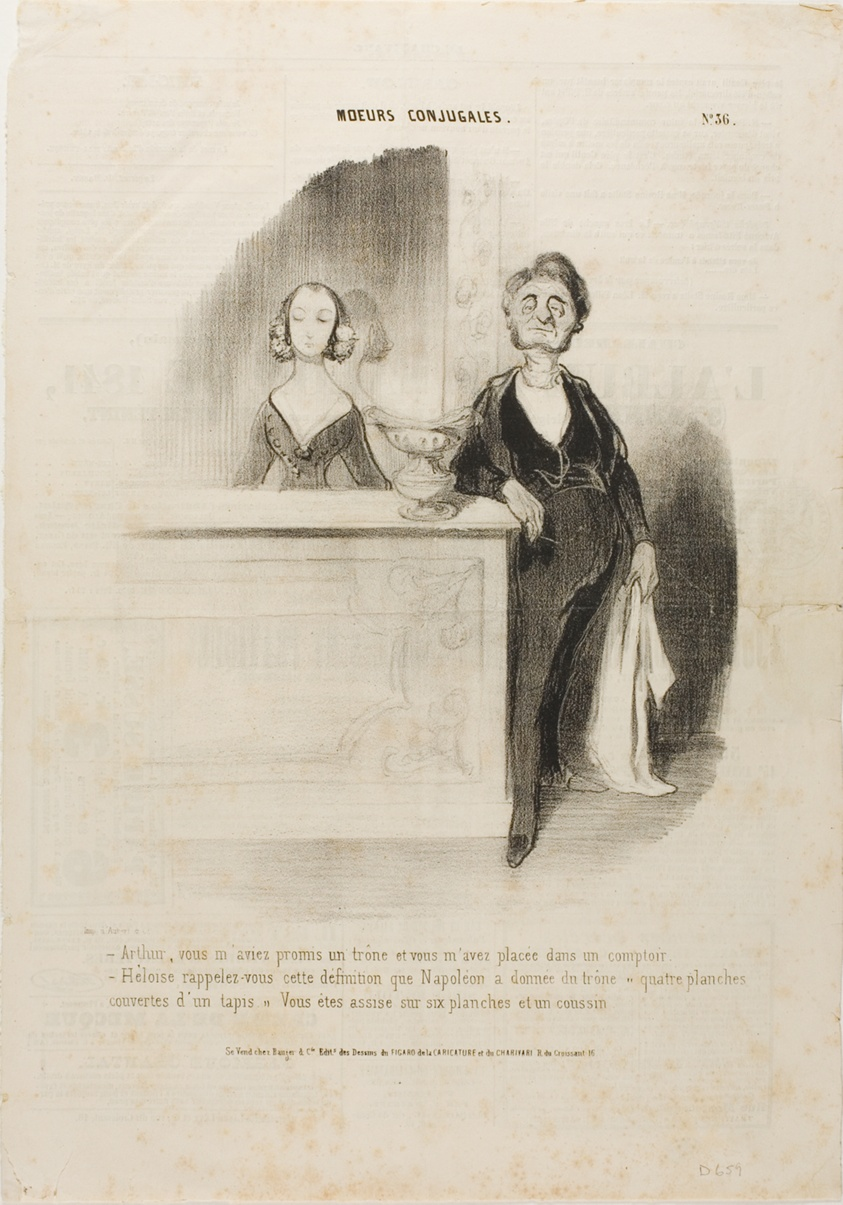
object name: Print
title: “- Arthur, you had promised me a throne and all you did is put me behind a counter. - Eloise, remember Napoleon's definition of a throne: 'four boards covered with a carpet.' You are sitting on six boards and a cushion,” plate 36 from Moeurs Conjugales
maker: Honoré Victorin Daumier; French, 1808-1879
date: published April 11, 1841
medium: Lithograph in black on cream wove paper, with text added in another hand and letterpress verso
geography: France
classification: lithograph; print; prints and drawing